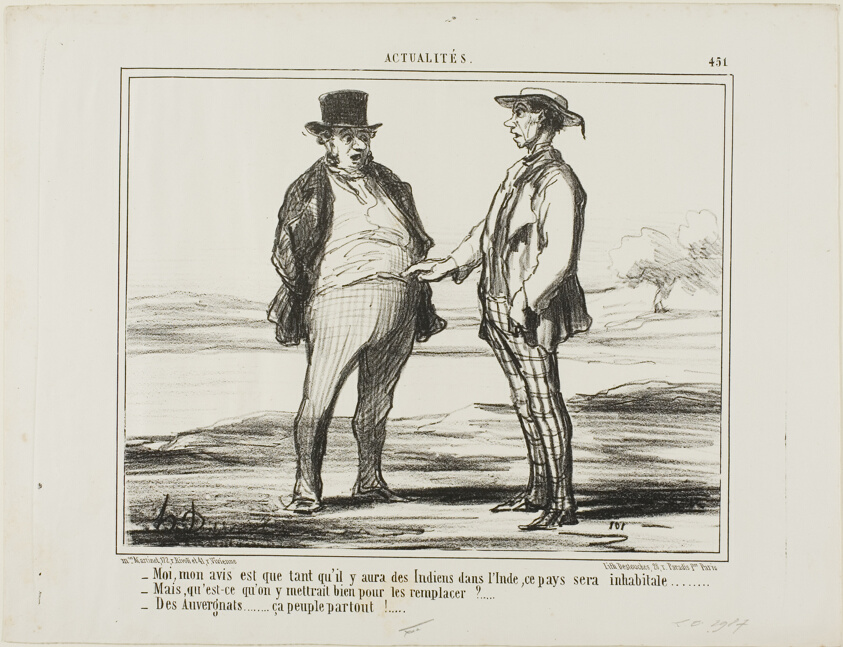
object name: Print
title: “- In my opinion: as long as there are Indians populating India... - But what do you want to replace them with?… - With Auvergnats… they settle everywhere!,” plate 451 from Actualités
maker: Honoré Victorin Daumier; French, 1808-1879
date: 1857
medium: Lithograph in black on white wove paper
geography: France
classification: lithograph; print; prints and drawing